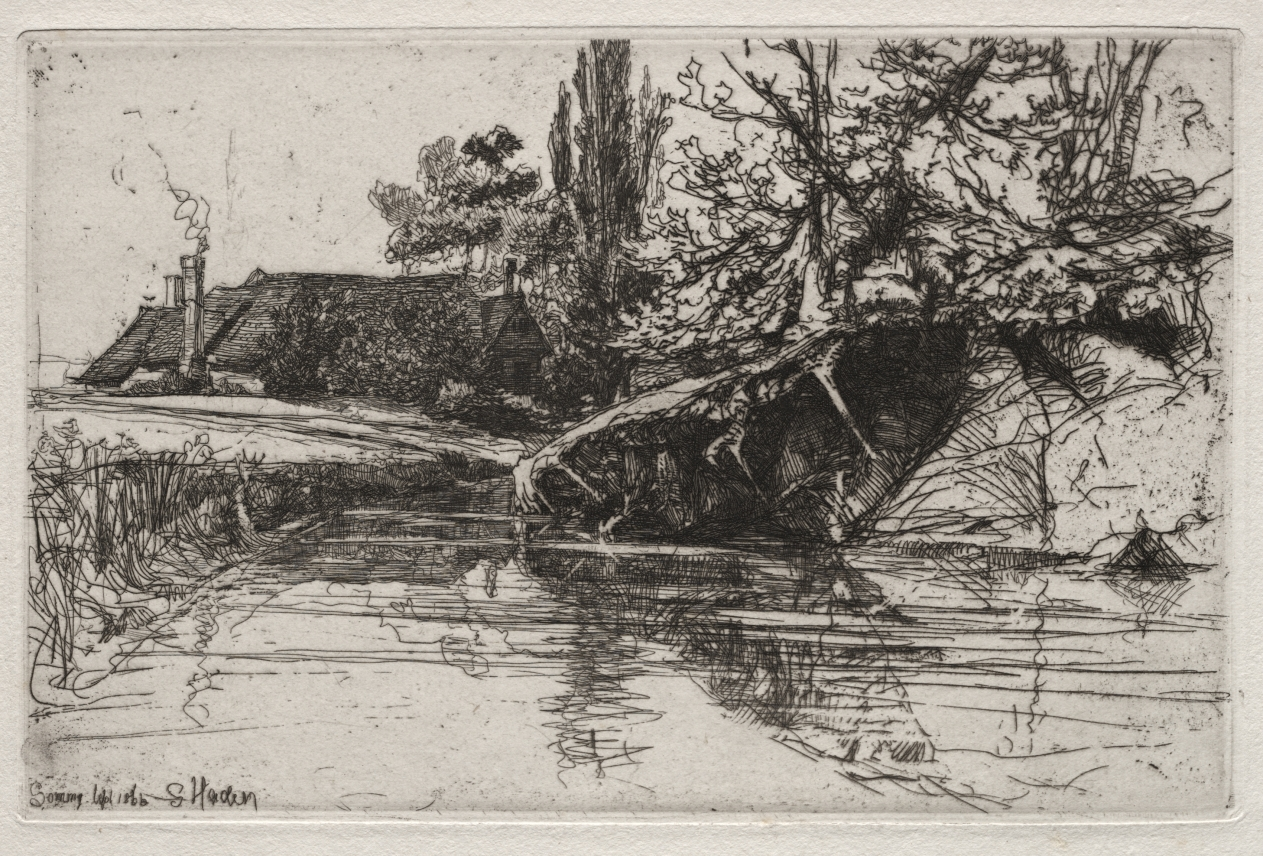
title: The Moat House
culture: England, 19th century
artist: Francis Seymour Haden (British, 1818–1910)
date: 1865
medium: etching and drypoint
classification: Print